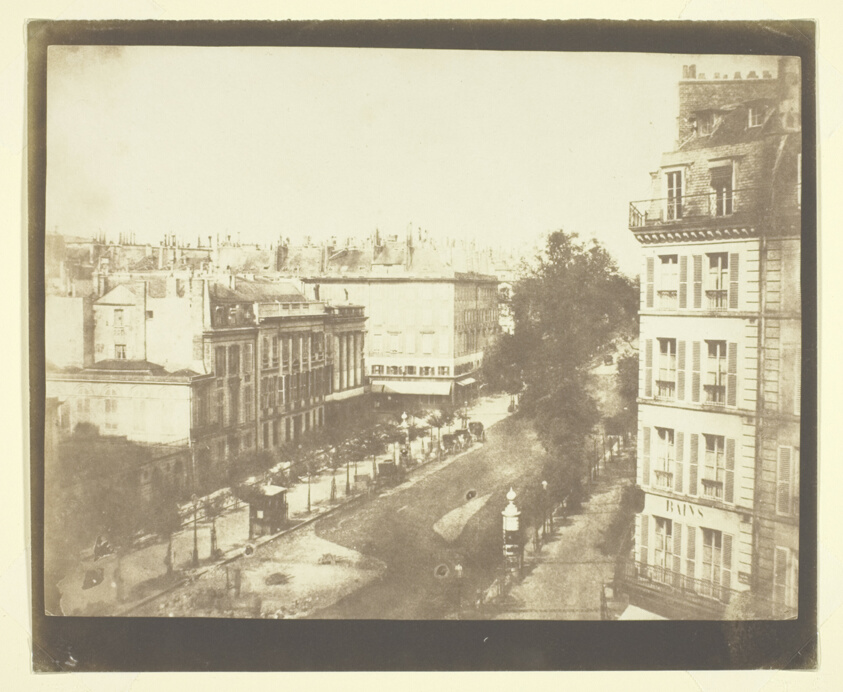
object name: Photograph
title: View of the Boulevards at Paris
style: 19th century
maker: William Henry Fox Talbot (English, 1800–1877)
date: 1843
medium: Salted paper print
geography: England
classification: salted paper print; photographic process; photography; photograph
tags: Paris